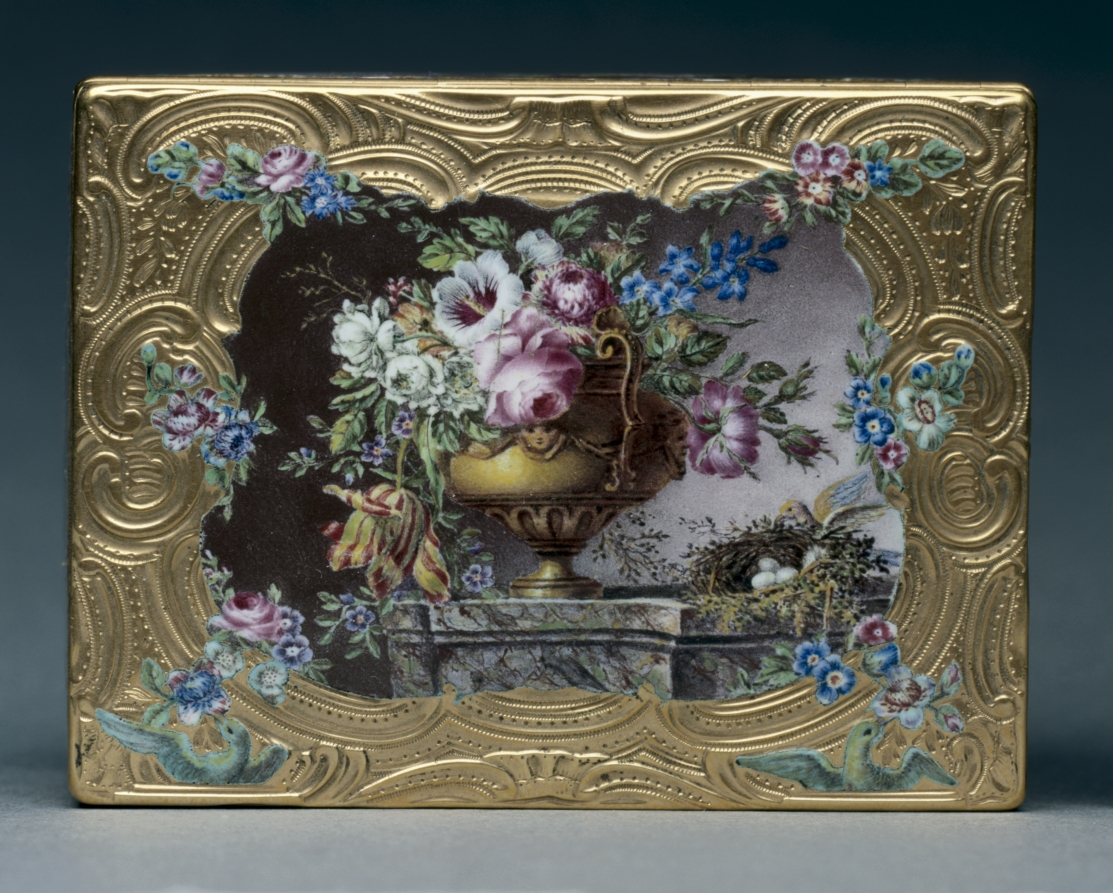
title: Snuff Box (Tabatière)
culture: France, 18th century (style of Louis XV)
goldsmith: Francois Guillaume Tiron (French)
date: 1756–57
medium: gold and enamel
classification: Miscellaneous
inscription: [Maker's mark of Francois-Guillaume Tiron, master goldsmith in 1747, inside cover; left wall]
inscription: [Warden's mark for Paris, 1756-1757, inside cover]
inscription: [Charge mark of Julien Berthe, Paris, 1750-1756, inside cover; left wall]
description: The miniature paintings that decorated snuff boxes were depicted in intricate detail requiring complex technical skill. This box’s miniatures are painted with enamel en plein, meaning the enamel has been applied directly to the metal of the box. A different enameling technique, basse-taille, is used to depict the doves and floral borders. Here, the gold has been chiseled away and filled with translucent enamel in order to produce a three-dimensional effect.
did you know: In the mid-1700s François-Guillaume Tiron worked alongside his brother, Jean-Marie Tiron, one of the most celebrated makers of gold boxes of the 18th century.